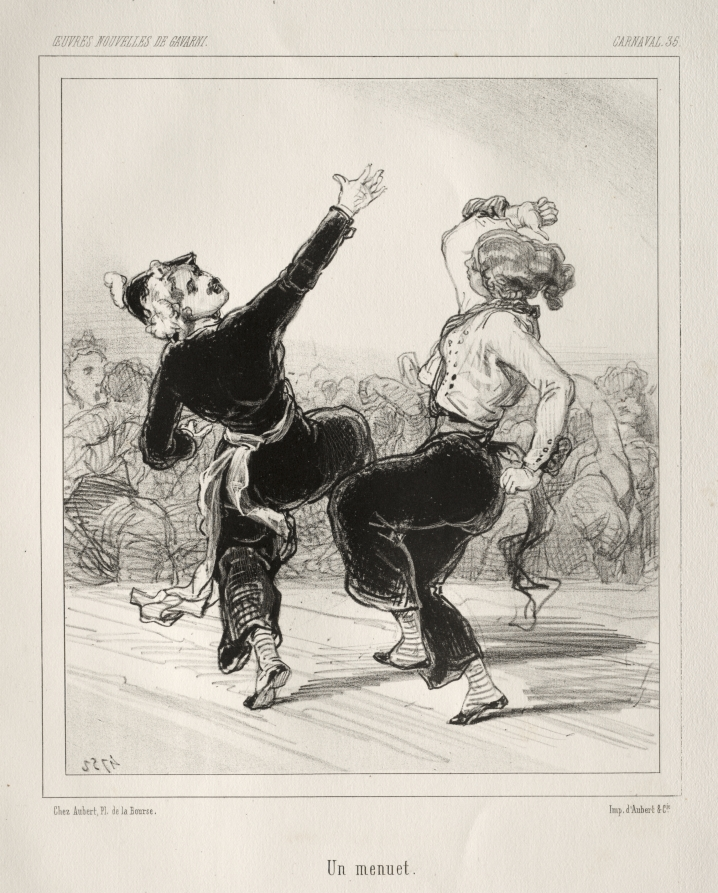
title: Carnaval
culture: France, 19th century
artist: Paul Gavarni (French, 1804–1866)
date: c. 1841–47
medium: lithograph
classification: Print